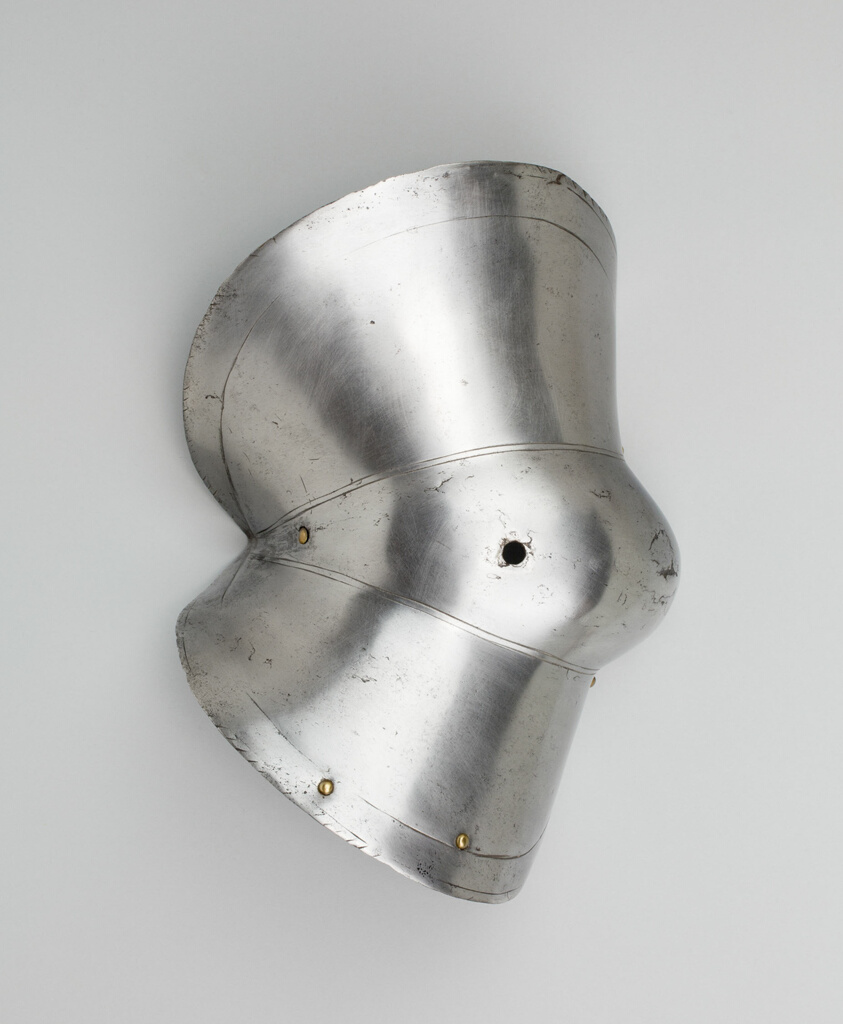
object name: Armor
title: Reinforce for the Left Cowter for Use in the Tilt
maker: Northern Italian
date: c. 1560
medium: Steel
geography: Northern Italy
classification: suit-element; armor; arms and armor